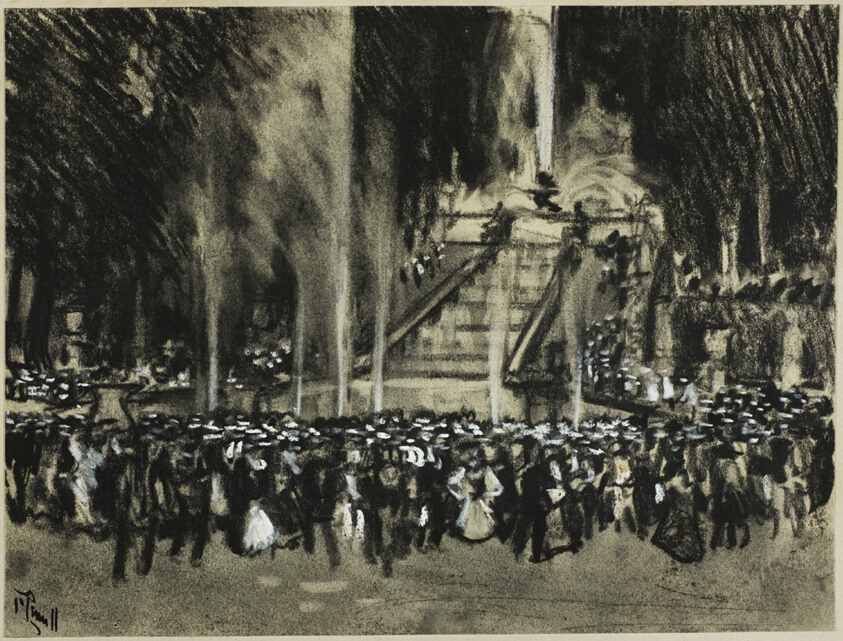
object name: Drawing and Watercolor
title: The Fountains Playing at La Granga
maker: Joseph Pennell (American, 1857-1926)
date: c. 1903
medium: Oiled charcoal with stumping and erasing, heightened with white chalk, on cream wove paper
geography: United States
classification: charcoal; drawings (visual works); prints and drawing